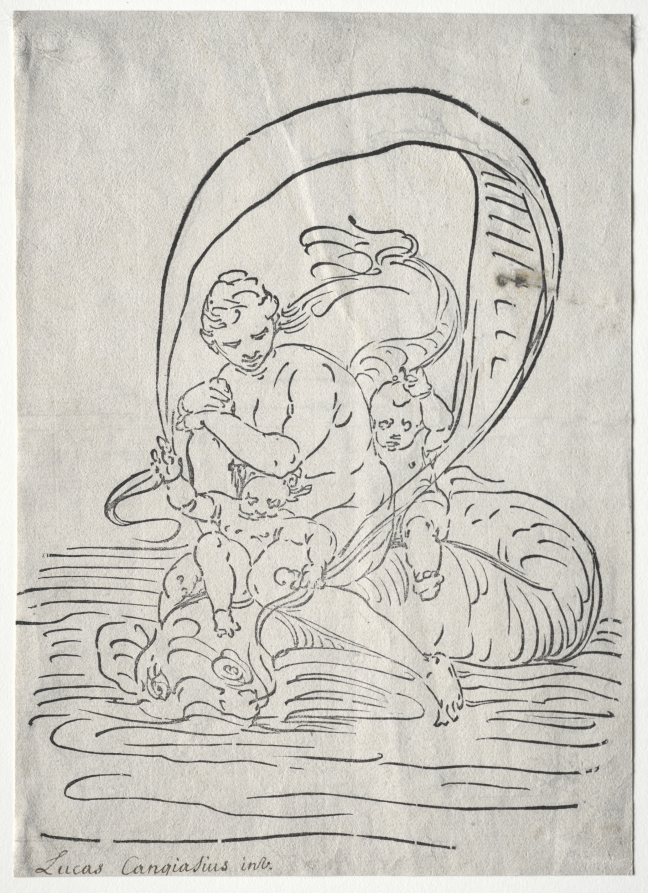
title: The Triumph of Amphitrite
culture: Italy, 16th century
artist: Luca Cambiaso (Italian, 1527–1585)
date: mid-1500s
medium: woodcut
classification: Print